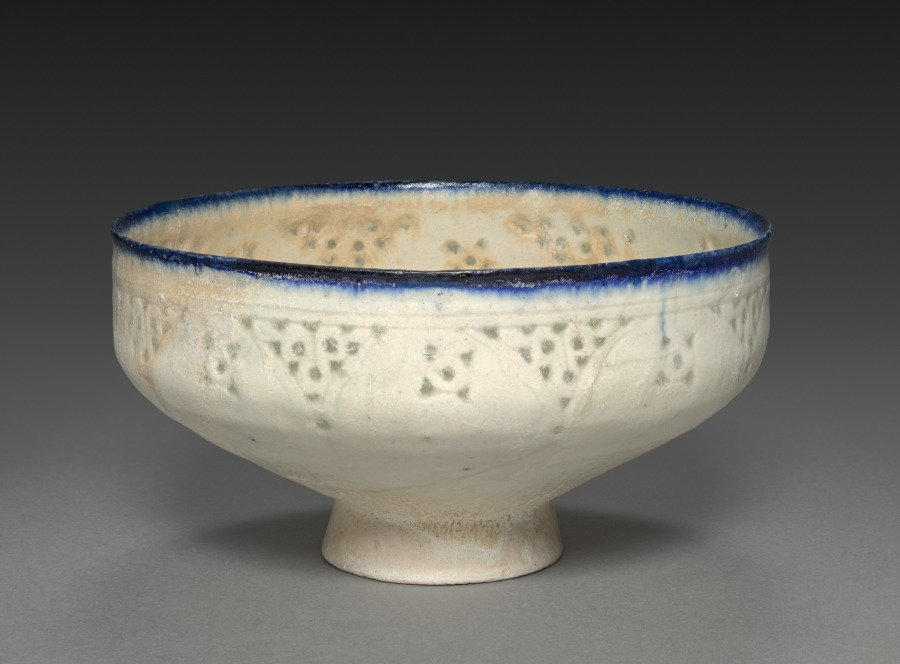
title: Footed Bowl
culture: Iran, probably Kashan, Seljuq period, late 12-early 13th century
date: late 1100s–early 1200s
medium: fritware, pierced and underglaze painting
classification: Ceramic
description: Iranian potters created transparency by piercing and glazing frit-body walls. Here, triangles and rosettes decorate incised scallops beneath the blue rim. The footed shape is derived from Iranian metal bowls.